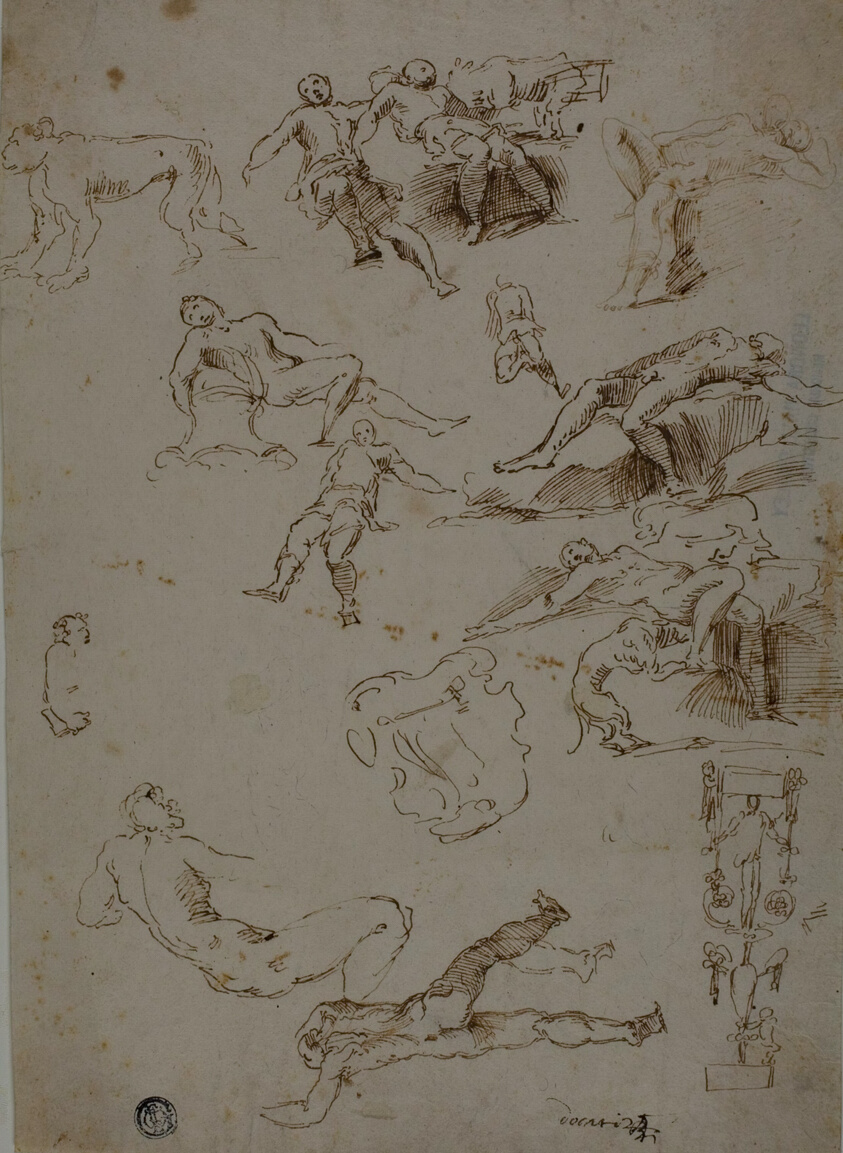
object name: Drawing and Watercolor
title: Sketches of Male Nudes, Animals, and Ornamental Details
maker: After Polidoro Caldara, called Polidoro da Caravaggio; Italian, c. 1499-c. 1543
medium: Pen and brown ink on cream laid paper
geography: Italy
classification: pen and ink drawings; drawings (visual works); prints and drawing